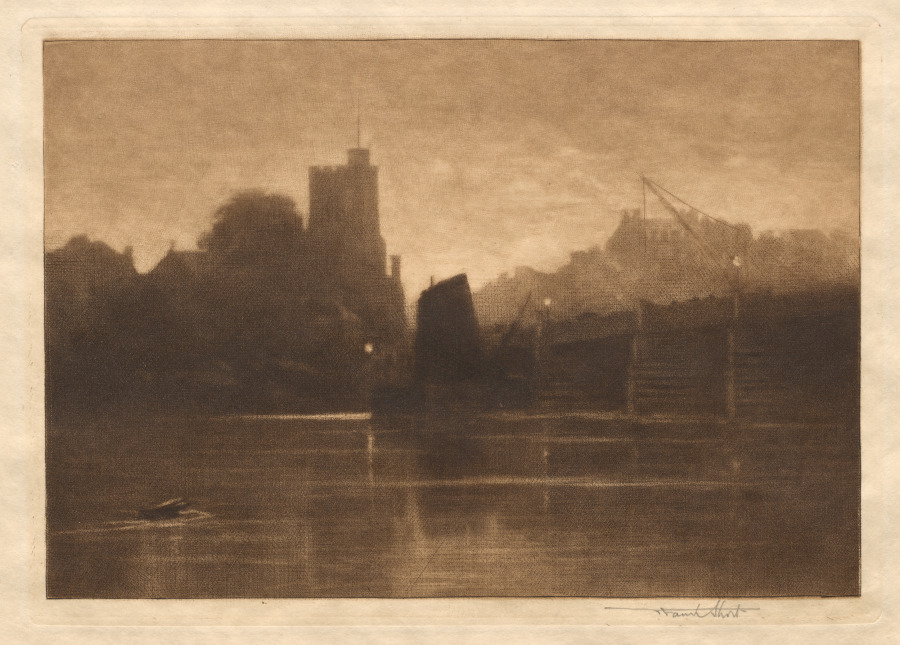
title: Ebb Tide, Putney Bridge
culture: England, 19th century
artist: Frank Short (British, 1857–1945)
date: 1885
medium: mezzotint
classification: Print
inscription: Below image, lower right, in graphite: Frank Short